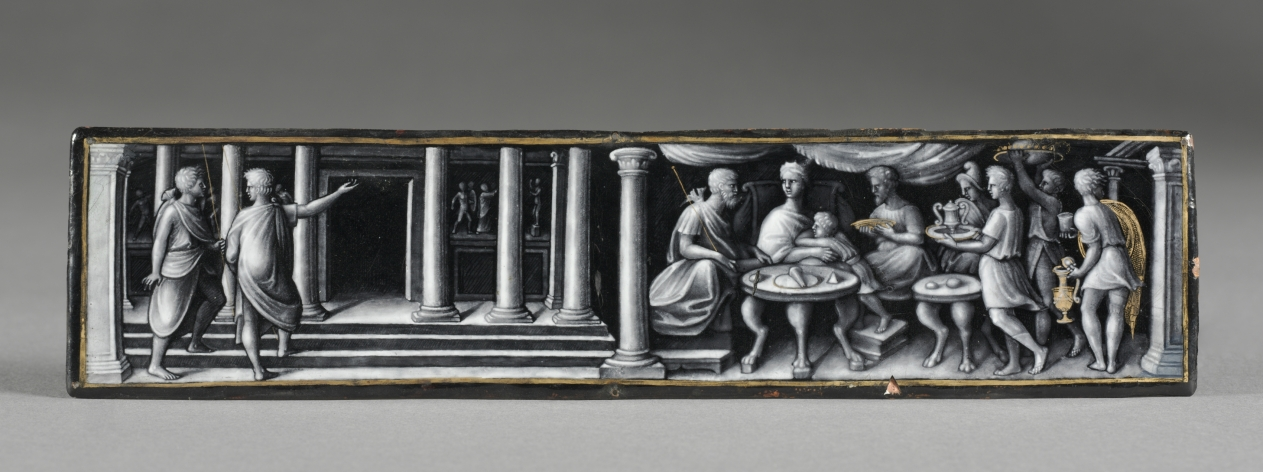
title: Plaque Depicting a Scene from the Aeneid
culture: France, Limoges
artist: Jean II Pénicaud (French, c. 1520–1588)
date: 1500s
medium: painted enamel (grisaille) on copper with gilding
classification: Enamel